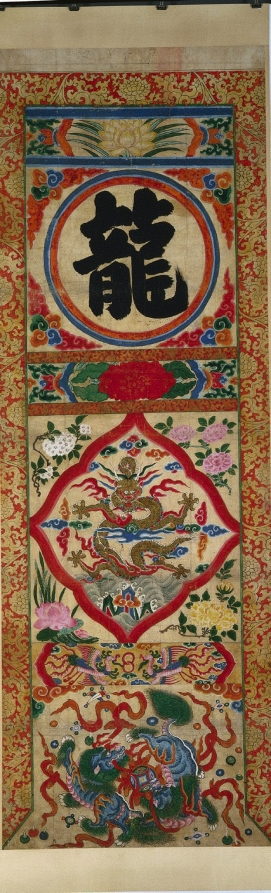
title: Painted Panel of Character "Dragon"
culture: Korea, Joseon dynasty (1392–1910)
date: early 1900s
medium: hanging scroll, ink and color on paper; unmounted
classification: Painting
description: This set of four colorful hanging scrolls may have been used in an outdoor Buddhist ritual to evoke heavenly blessings. Each hanging scroll bears four different characters: tiger, dragon, whistle, and recite. Traditionally, tiger and dragon belong to the four directional guards, respectively west and east.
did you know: This set of four colorful hanging scrolls may have been used in an outdoor Buddhist ritual to evoke heavenly blessings.